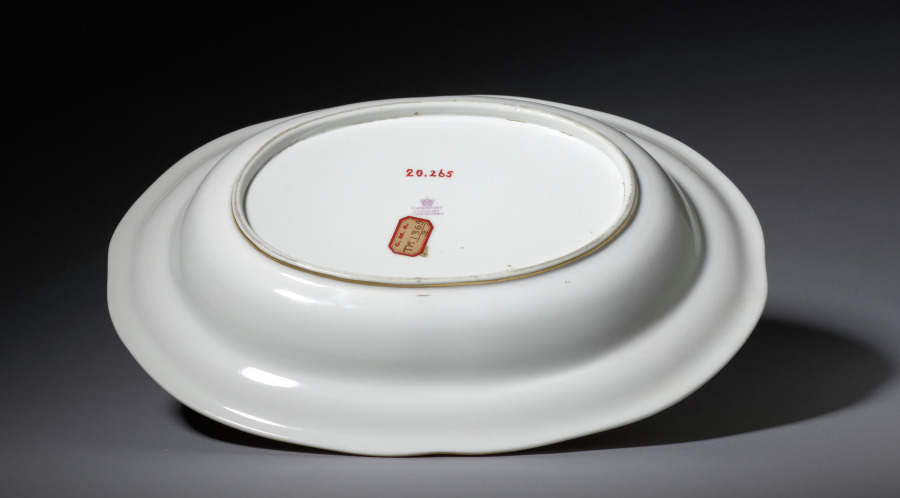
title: Vegetable Dish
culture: England, Staffordshire, early 19th century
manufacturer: Davenport Pottery and Porcelain Factory (British)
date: early 1800s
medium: ceramic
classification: Ceramic